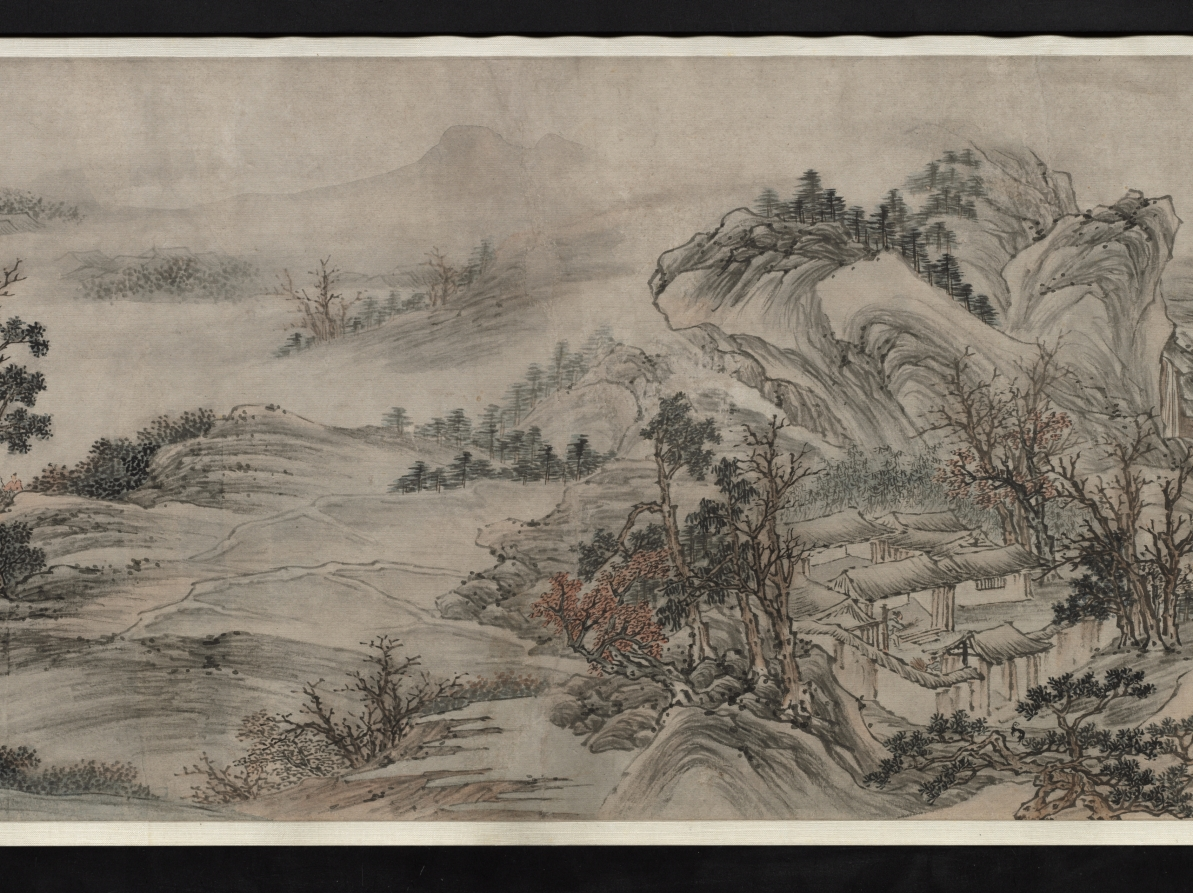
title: Autumn Mist in the Countryside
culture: China, Qing dynasty (1644-1911)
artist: Zou Zhe (Chinese, c. 1610-before 1688)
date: 1647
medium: handscroll, ink and color on paper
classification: Painting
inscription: Artist's inscription, signature, and seal: The first day of the sixth lunar month, the ting-hai year [1647], Tsou Che painted [this]. [seal] Fang-lu.